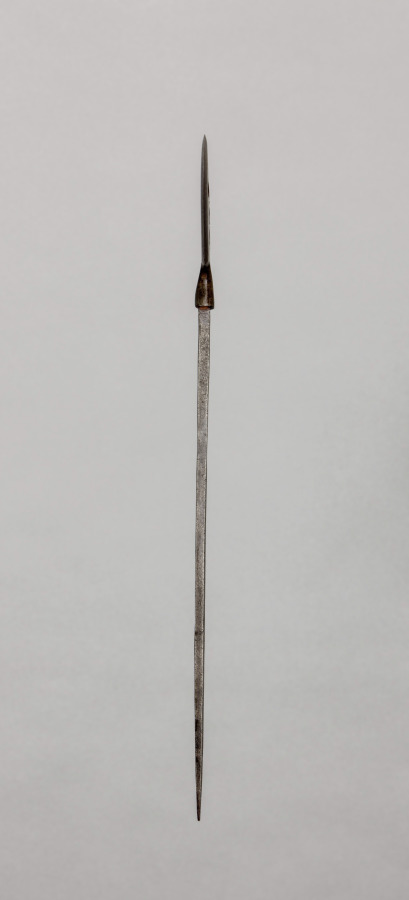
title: Arrow Head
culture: Japan, Edo period (1615–1868)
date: 1600s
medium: iron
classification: Arms and Armor